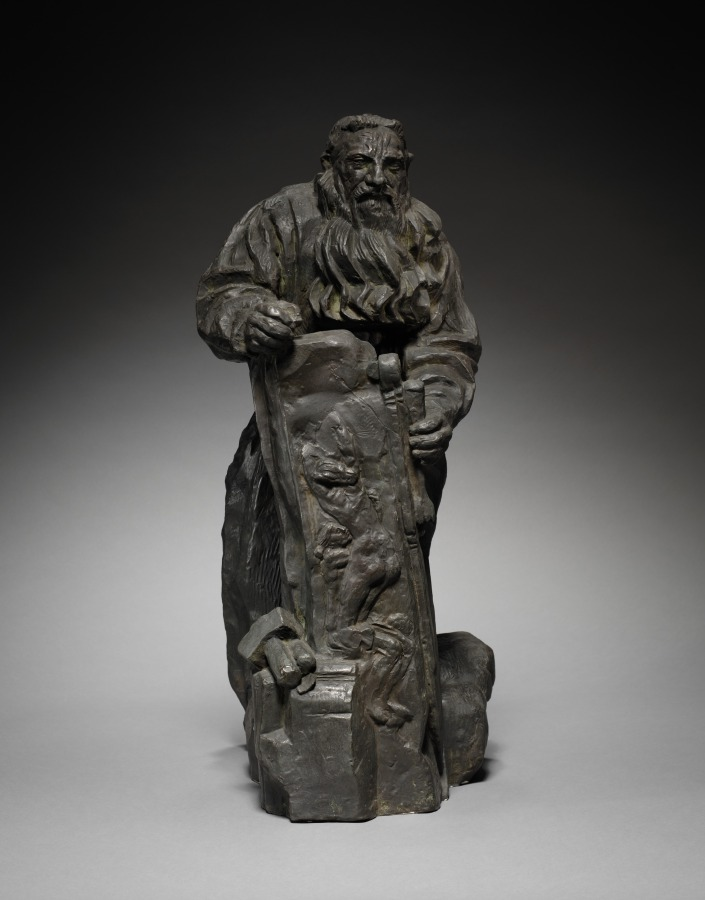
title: Rodin Working on "The Gates of Hell"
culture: France, 20th century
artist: Emile Antoine Bourdelle (French, 1861–1929)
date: 1910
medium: bronze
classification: Sculpture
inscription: Inscribed on side: "Rodin travaillant a la porte de l'enfer"; "Emile-Antoine Bourdelle, 1910"